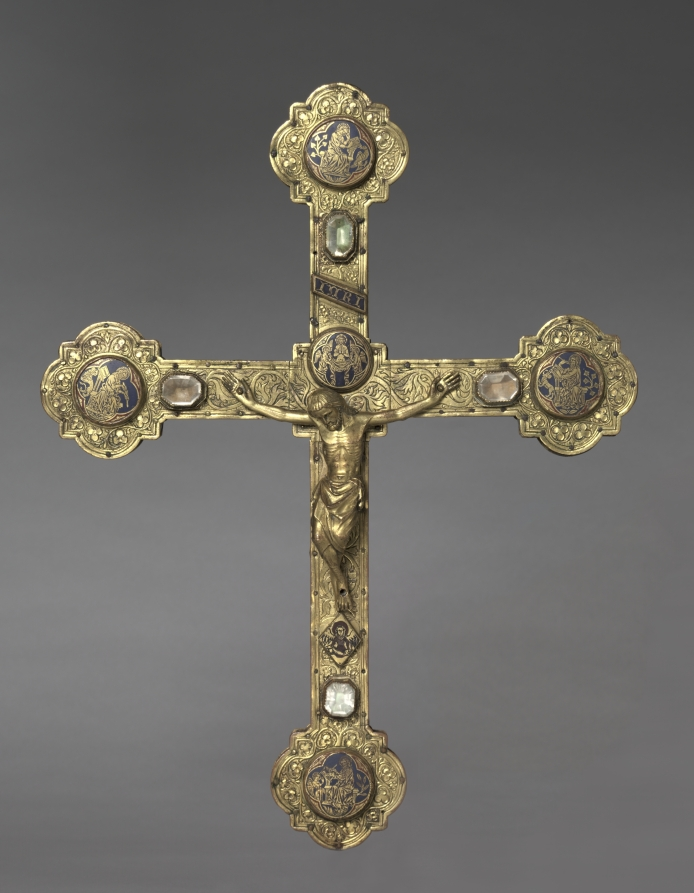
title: Altar Cross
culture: Germany or Austria, Upper Rhine, Constance, 14th century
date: c. 1300–1310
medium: gilt copper, champlevé enamel, gemstones, on wood core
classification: Metalwork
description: This cross is traditionally said to come from the Benedictine Abbey of Meherau on Lake Constance in today’s Austria. During the 12th and 13th centuries the abbey became wealthy through the acquisition of landed property. This beautiful cross would have likely embellished one of the abbey’s many altars where it symbolized Christ’s presence in the Mass.